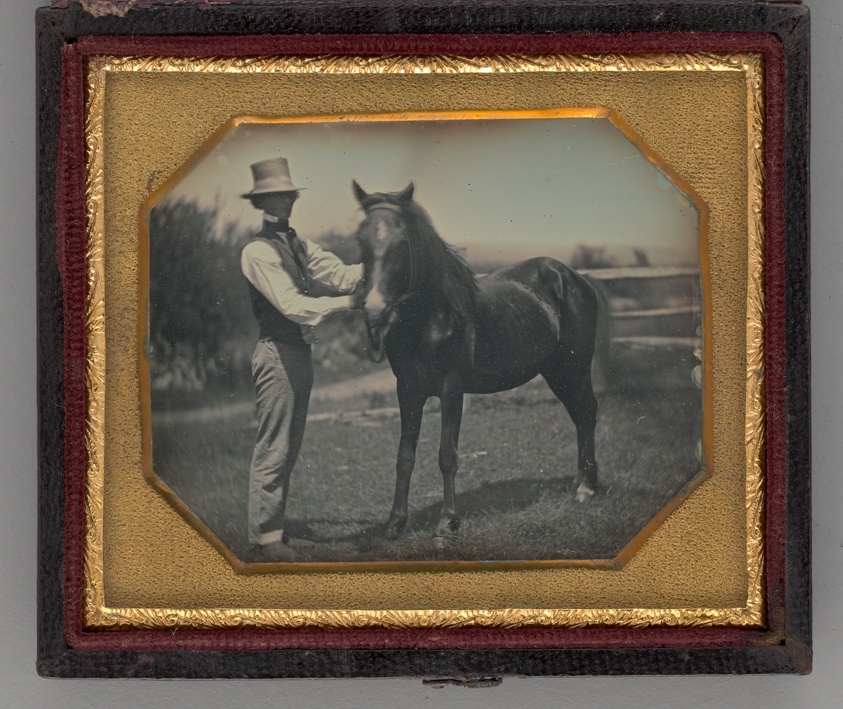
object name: Photograph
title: Untitled (Portrait of a Man Wearing a Top Hat Standing Next to a Horse)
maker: Unknown maker; American, 19th century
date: 1850s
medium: Daguerreotype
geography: United States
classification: portrait; daguerreotype; portrait; photograph; photographic process; photography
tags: lundberg collection